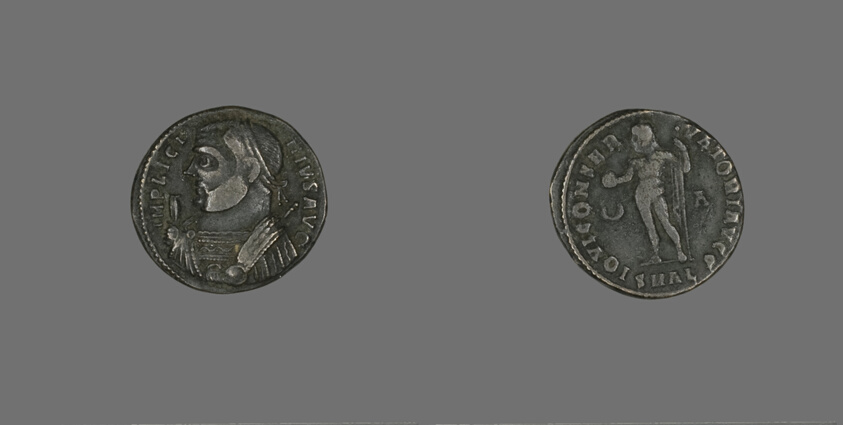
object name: Coin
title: Coin Portraying Emperor Licinius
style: roman (ancient, style or period), ancient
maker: Roman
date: 307-324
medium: Bronze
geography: Roman Empire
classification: coin; ancient art